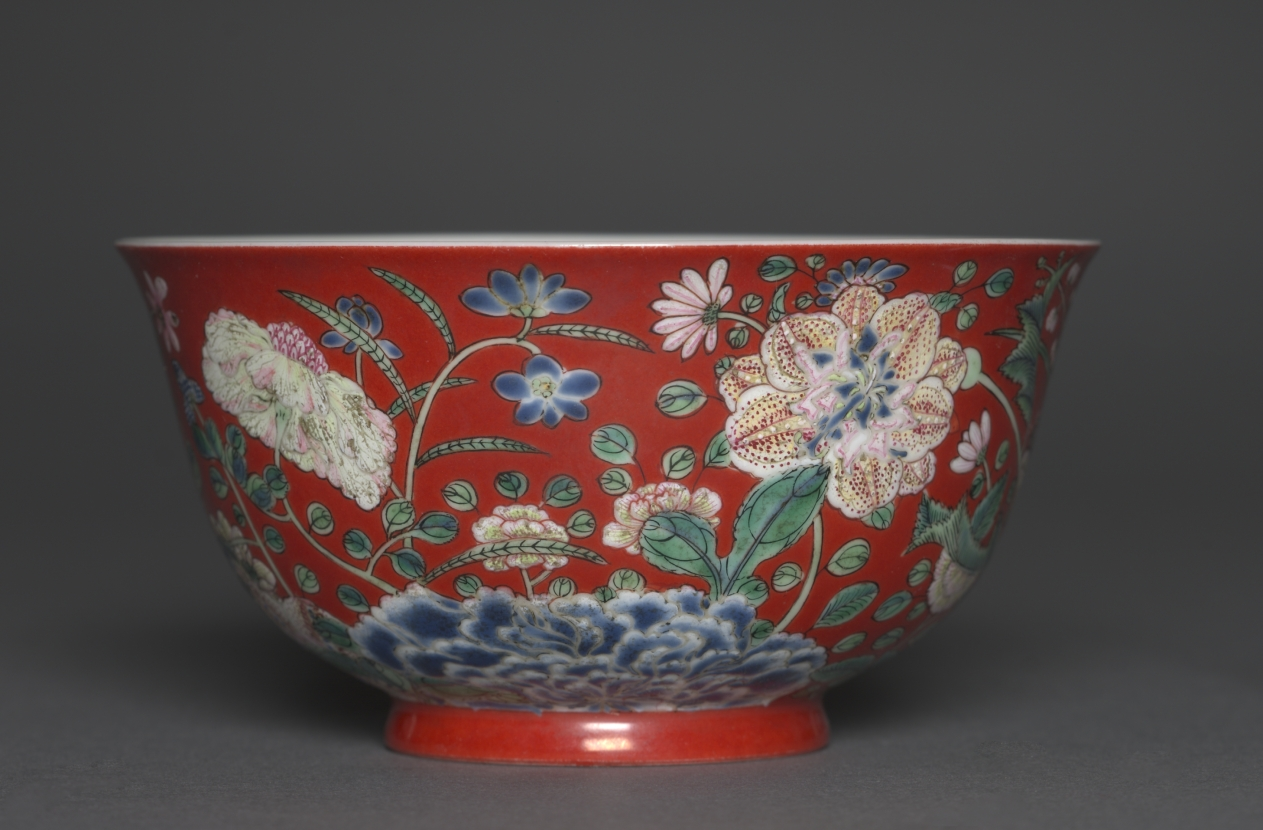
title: Bowl with Flowering Plants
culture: China, Jiangxi province, Jingdezhen, Qing dynasty (1644–1911), Yongzheng mark and reign (1723–35)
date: 1723–35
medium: porcelain with overglaze enamel decoration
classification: Ceramic